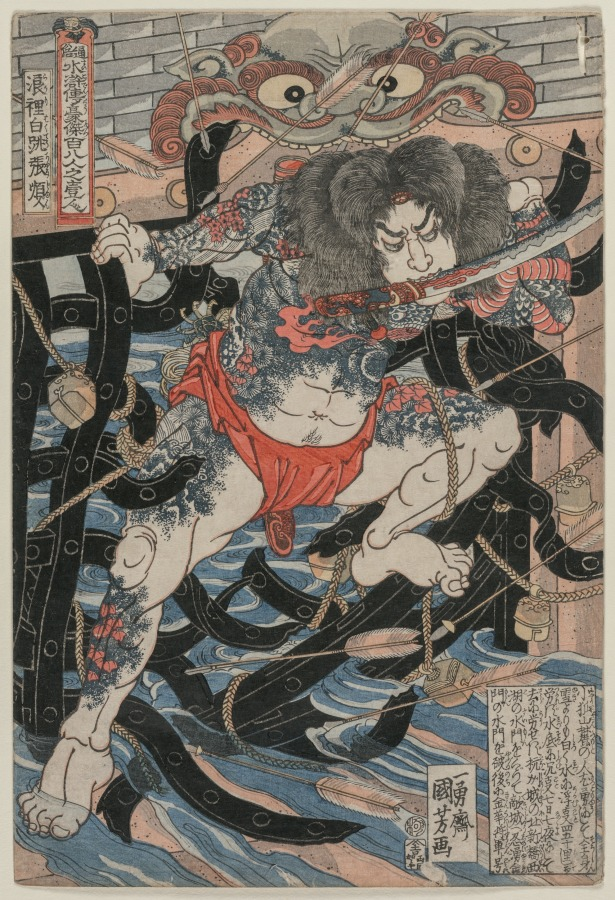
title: Rori Hakucho Chojun (from the series 108 Heroes of the Novel Shui Hu Chuan)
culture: Japan, Edo period (1615–1868)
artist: Utagawa Kuniyoshi (Japanese, 1797–1861)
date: late 1820s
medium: color woodblock print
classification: Print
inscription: Signature: Ichiyusai Kuniyoshi ga Publisher: Kagaya, Ryogoku (emblem) Censorship Seal: kiwame